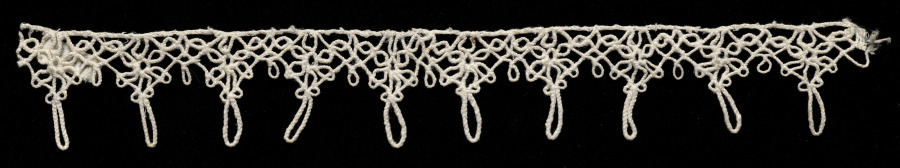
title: Lace Edging with Loops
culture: Italy, Venice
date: 1600s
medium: Bobbin lace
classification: Lace